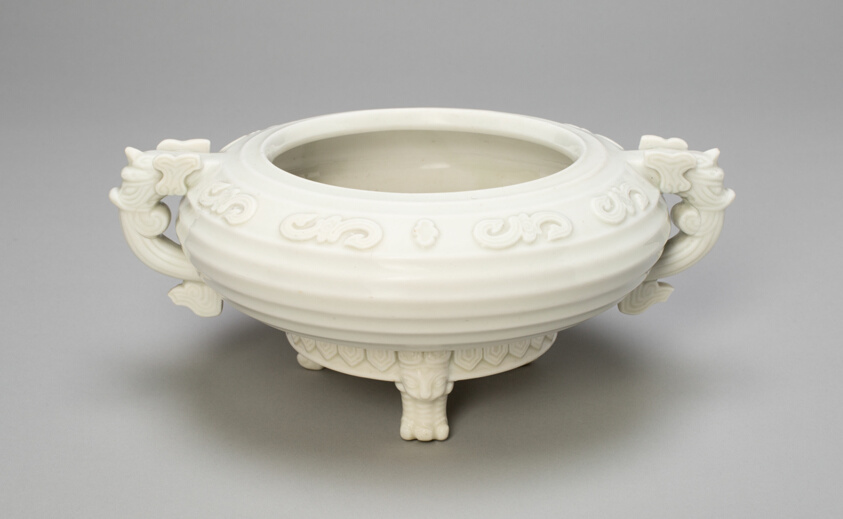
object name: Vessel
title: Censer in the Form of Ancient Bronze Tureen (gui)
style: Chinese (culture or style)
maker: China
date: Qing dynasty (1644–1911)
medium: Porcelain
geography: China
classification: porcelain; asian art; ceramics; vessel